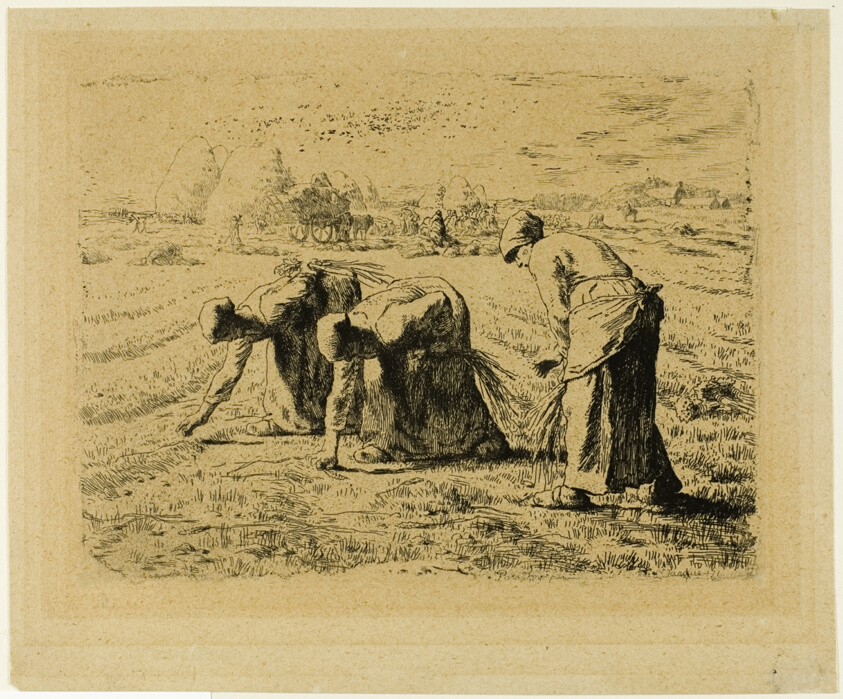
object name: Print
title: The Gleaners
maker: Jean François Millet (French, 1814-1875); printed by Auguste Delâtre (French, 1822-1907)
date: 1855–56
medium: Etching and drypoint on tan laid China paper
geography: France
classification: etching; print; prints and drawing